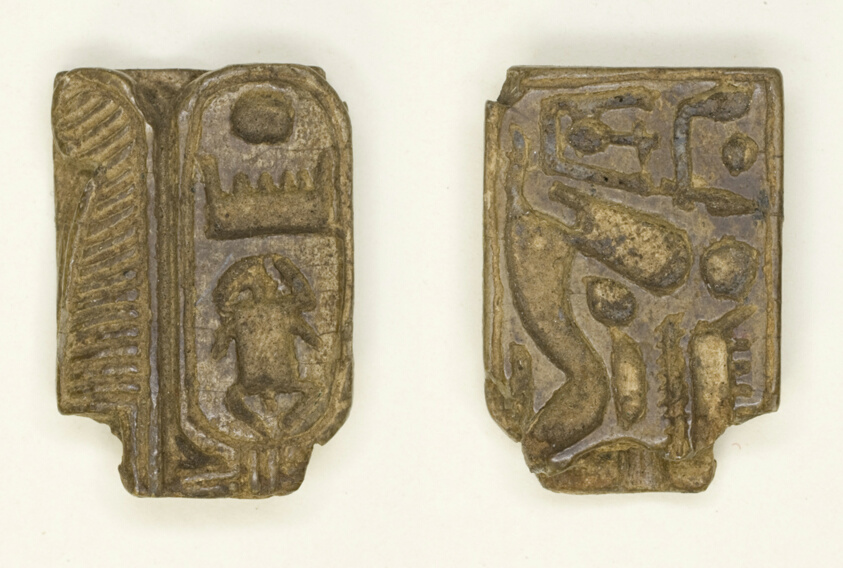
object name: Costume and Accessories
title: Plaque: Menkheperre (Thutmose III)/Sphinx with Crown and Beard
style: new kingdom, egyptian, ancient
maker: Egyptian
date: New Kingdom?, Dynasty 18–20 (about 1479–1069 BCE)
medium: Ceramic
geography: Egypt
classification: plaque (flat object); amulet; ancient art; costume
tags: Hieroglyphs, cartouches, feathers